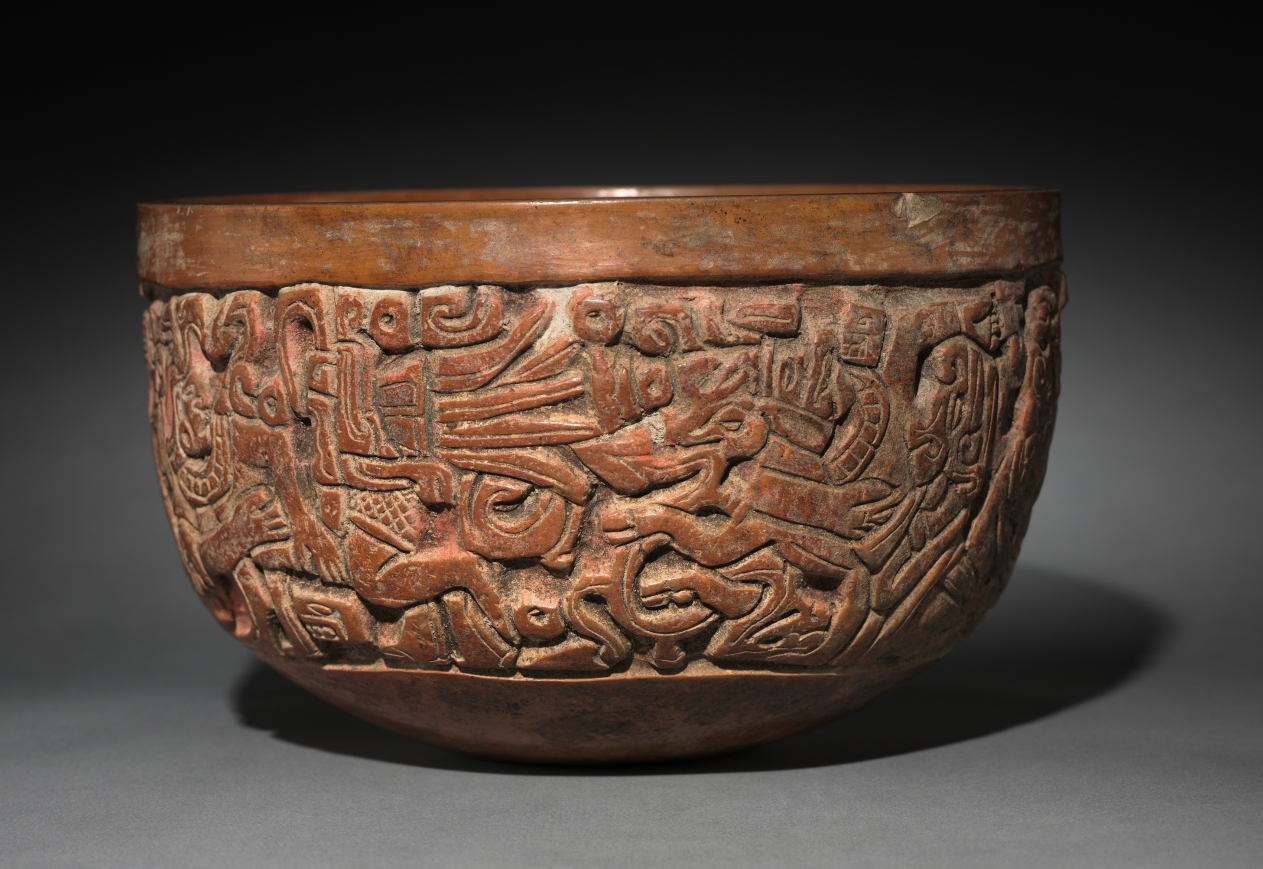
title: Bowl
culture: Mexico, South-central Veracruz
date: c. 500–1000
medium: molded, carved, and burnished pottery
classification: Sculpture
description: This mold-made ceramic bowl is decorated with a band of figures depicted in low relief. Most wear masks or grotesque headdresses, and four seem to struggle with deer. The meaning of the scene, which may be drawn from myth, is unknown.